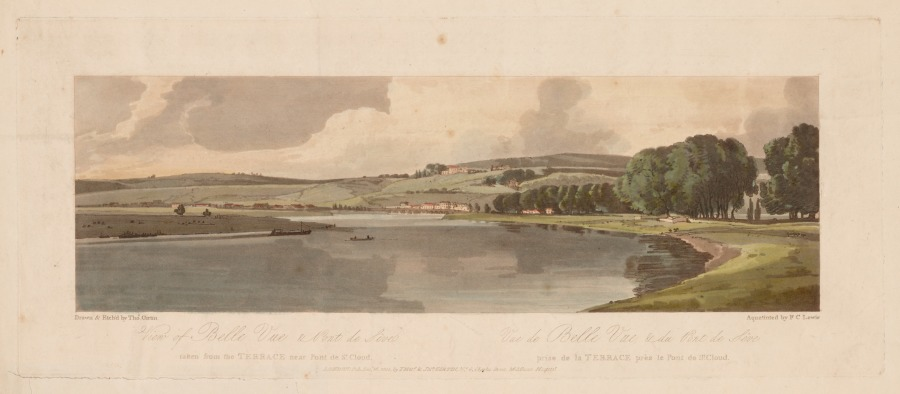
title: A Selection of Twenty of the Most Picturesque Views in Paris: View of Belle Vue & Pont de Sêve taken from the Terrace near Pont de St. Cloud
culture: England, 19th century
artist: Thomas Girtin (British, 1775–1802)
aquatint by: Frederick Christian Lewis (British, 1779–1856)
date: 1802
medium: Softground etching and aquatint, printed in brown, hand-colored with watercolor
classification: Print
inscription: In plate; Drawn & Etch'd by Thos Girtin; Aquatinted by F. C. Lewis; LONDON: Pubd Decr 16, 1802 by Thos & JNo Girtin, No. I, Little Newport Street, Gerrard Street, Soho. In plate, lower right: 13